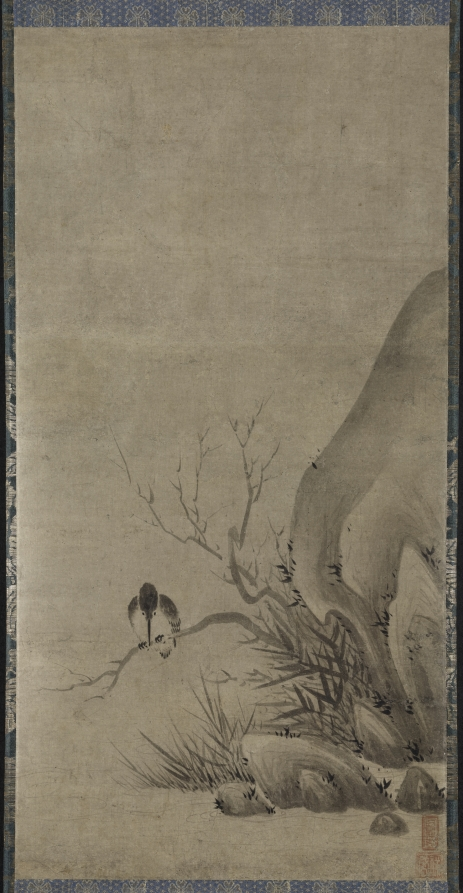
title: Kingfisher Perched above a Stream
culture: Japan, Muromachi period (1392–1573)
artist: Kenkō Shōkei (Japanese, active 1478–1506)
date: late 1400s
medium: hanging scroll; ink on paper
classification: Painting